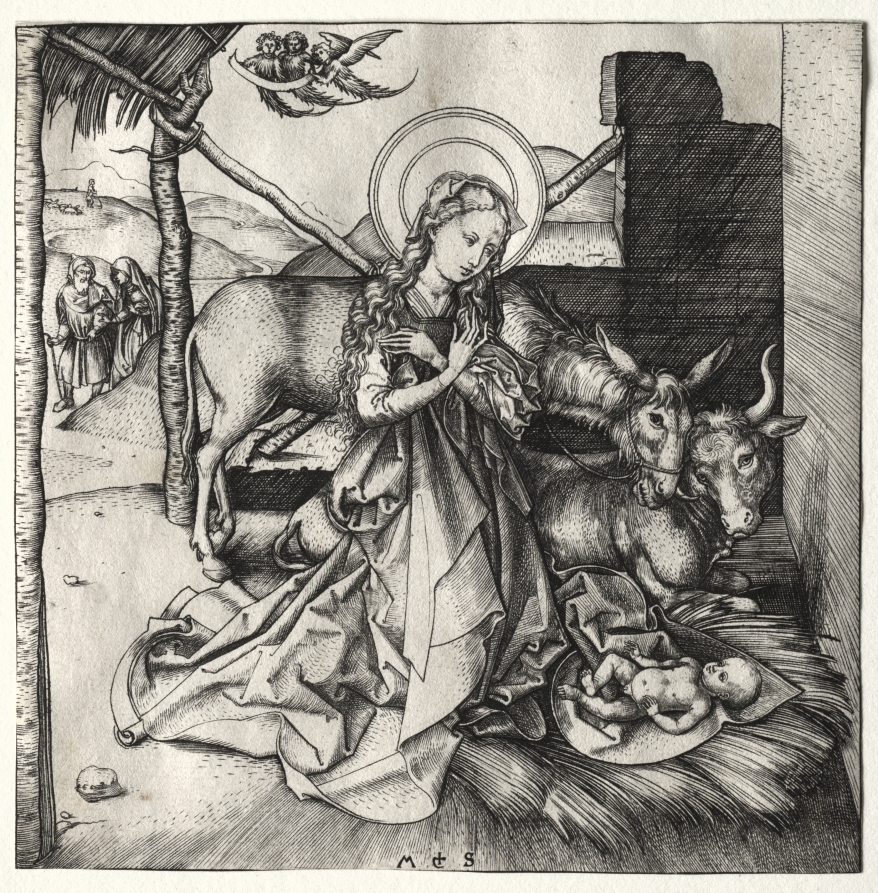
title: The Life of Christ: The Nativity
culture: Germany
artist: Martin Schongauer (German, c. 1450–1491)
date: c. 1480–90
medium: engraving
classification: Print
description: Martin Schongauer was among the first artists to work extensively in engraving to create series on the life of Christ and the saints. Here, he portrayed the Virgin, clothed in elaborate drapery, gazing upon her newborn son in a simple setting. To produce this work, Schongauer carved directly into a copper plate, creating depth and tonal variation using a system of crosshatching and parallel lines. His technical skill was admired by a young Albrecht Dürer, who later depicted the same subject.